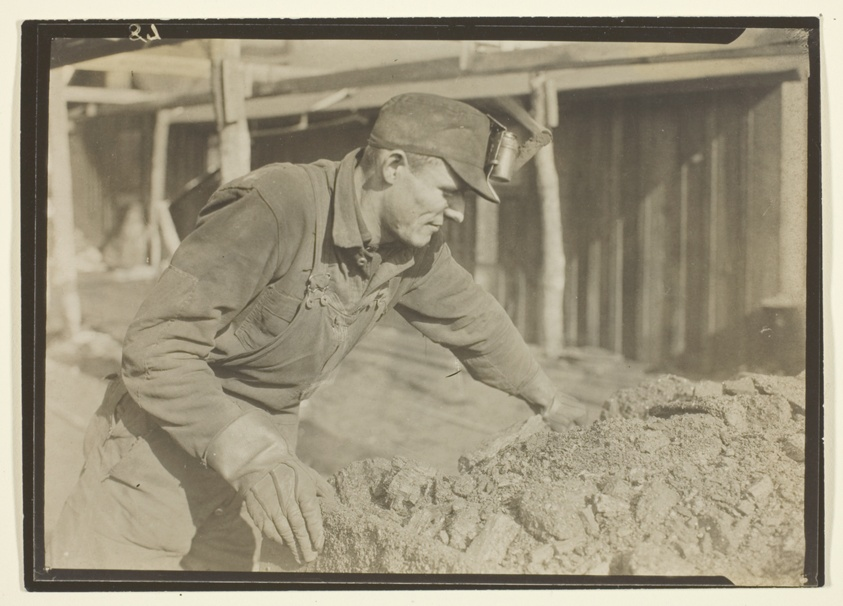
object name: Photograph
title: Brakeman on Coal Train, Pennsylvania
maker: Lewis Wickes Hine (American, 1874–1940)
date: 1920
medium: Gelatin silver print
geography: United States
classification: gelatin silver (developing-out-paper) pr; photographic process; photography; photograph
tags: Collected by Hugh Edwards, documentary